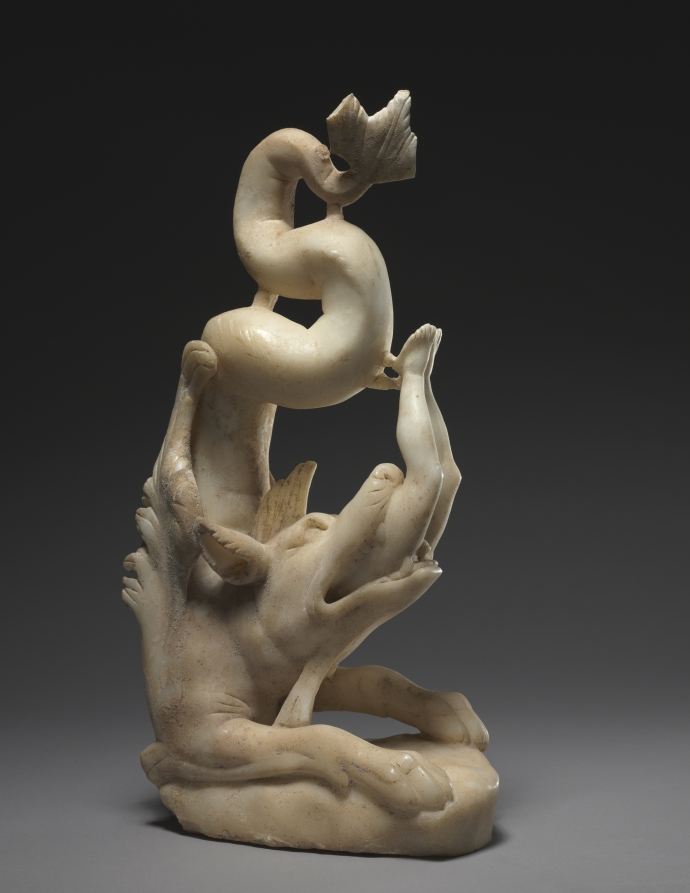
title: Jonah Swallowed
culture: Anatolia, late Roman-early Christian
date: 280–90 CE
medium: marble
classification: Sculpture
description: After disobeying the Lord’s command to proclaim judgment on the city of Nineveh, the Old Testament prophet Jonah was cast into the sea and swallowed by a sea monster. Here, the beast swallows Jonah headfirst.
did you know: Although usually thought of as a whale, here the artist has depicted Jonah swallowed by a cetus, a large, monstrous sea creature.